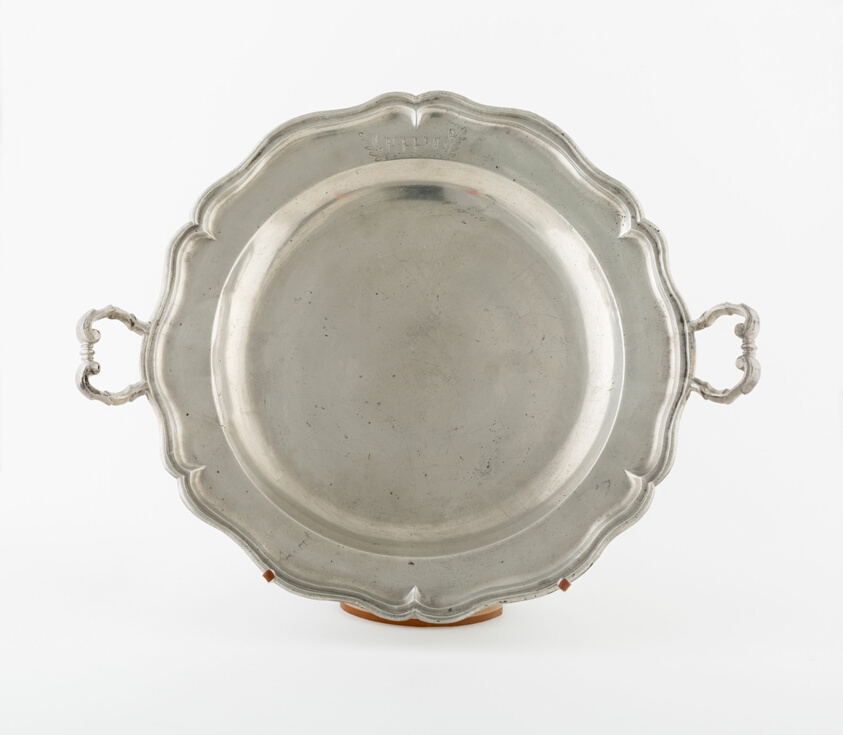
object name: Metalwork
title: Tray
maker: Germany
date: Late 18th century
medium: Pewter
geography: Germany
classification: pewter; metalwork; european decorative arts